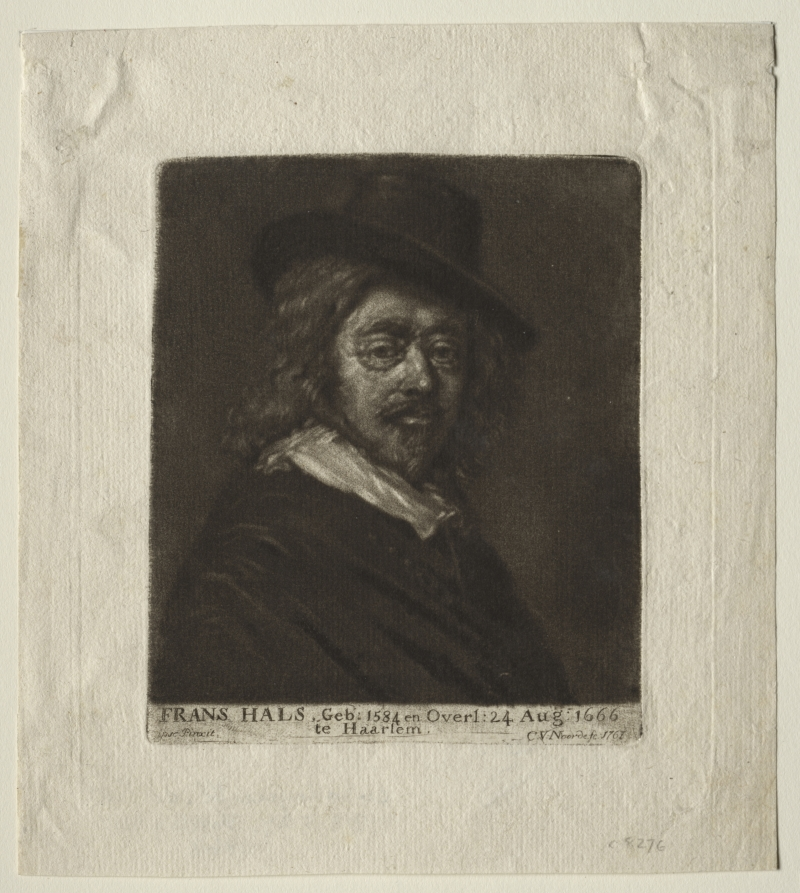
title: Frans Hals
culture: Netherlands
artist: Cornelis van Noorde (Dutch, 1731–1795)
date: 1761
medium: mezzotint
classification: Print